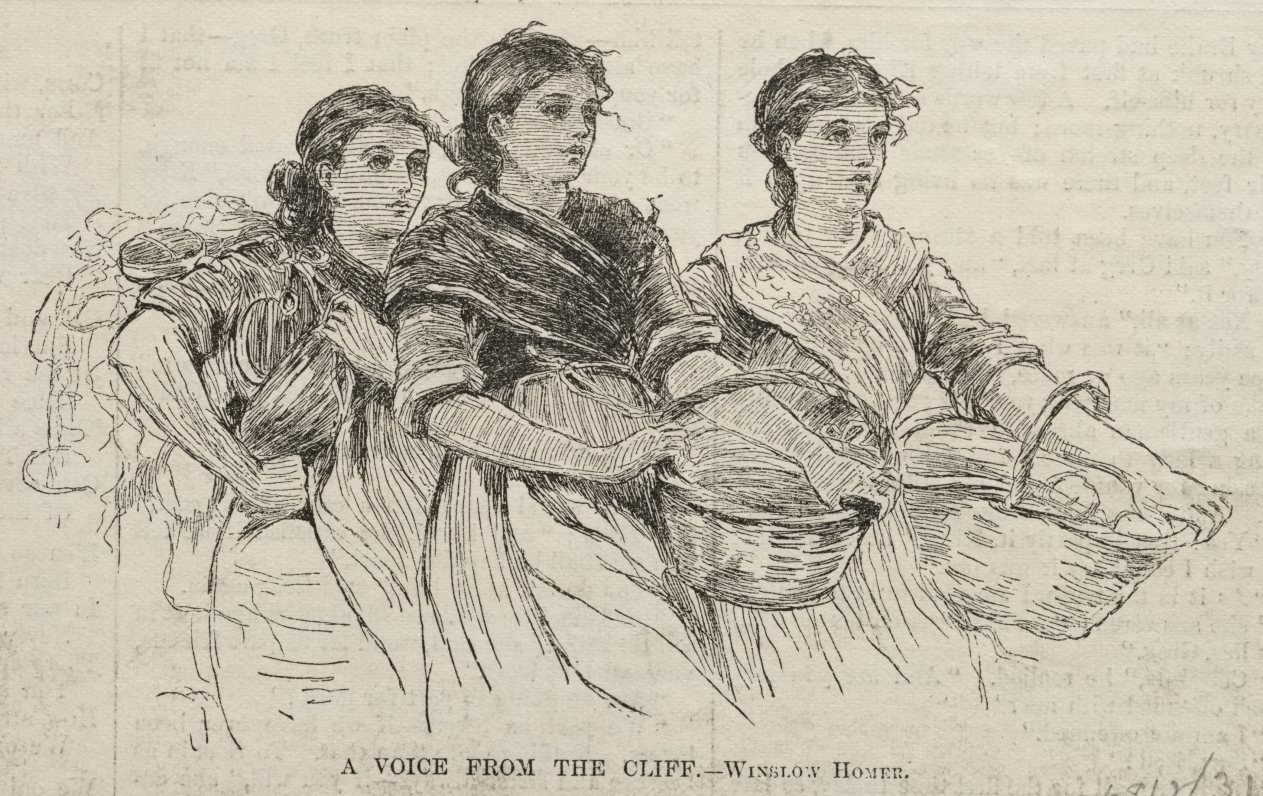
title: A Voice from the Cliff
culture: America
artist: Winslow Homer (American, 1836–1910)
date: 1880s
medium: wood engraving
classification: Print